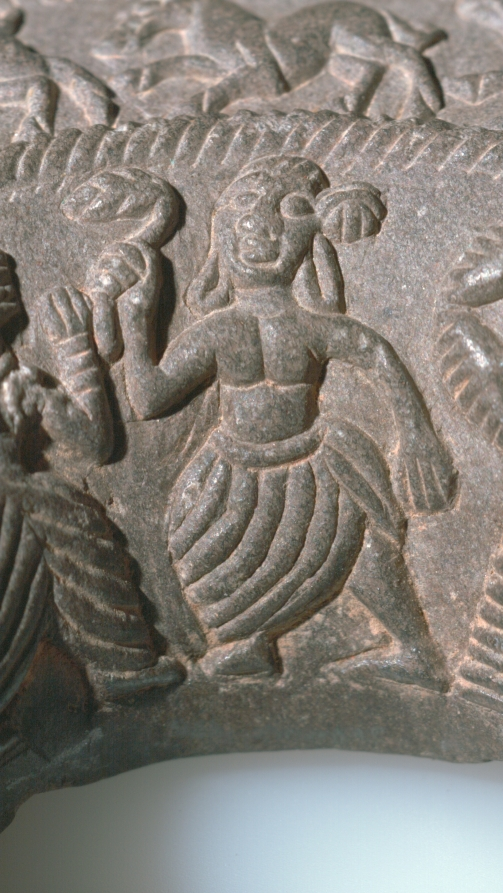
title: Ringstone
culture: India, Maurya period (322–185 BCE)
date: 200s BCE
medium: steatite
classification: Sculpture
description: Ringstones are among the earliest works of art to be created in stone during India's historical period. This example is finely carved with detailed images of affectionate couples and palm trees, running animals, and geometric motifs in concentric circles. The function of ringstones remains uncertain, since none of the surviving examples is inscribed or explained in a text.